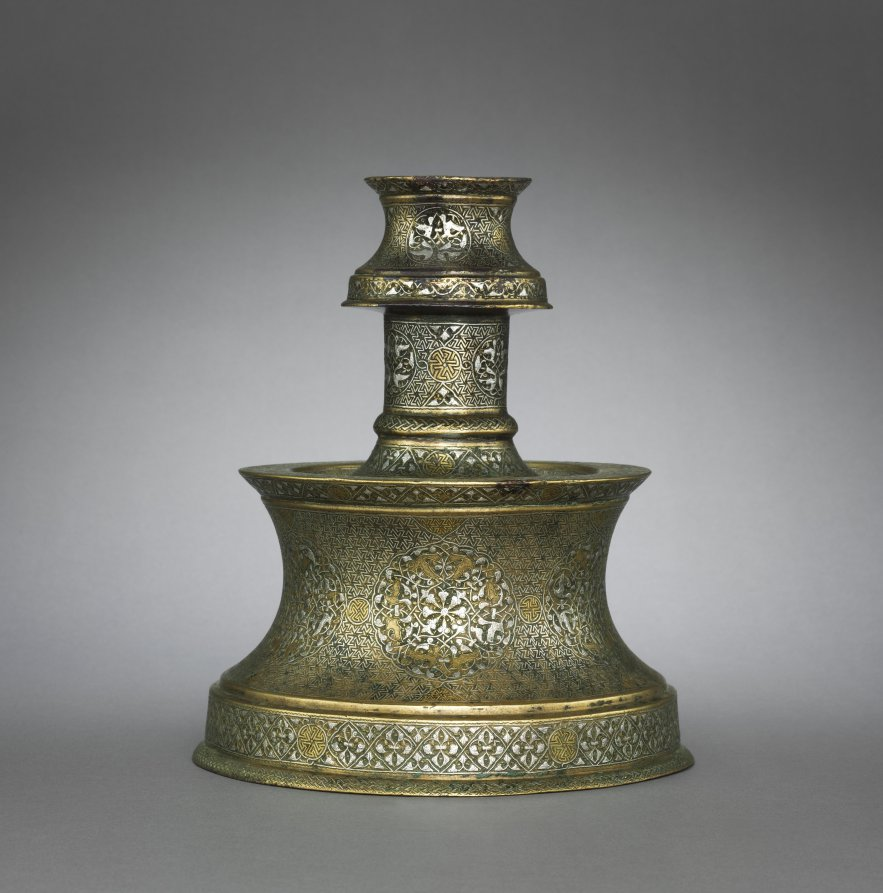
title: Candlestick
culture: Eastern Anatolia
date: 1250–1350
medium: sheet brass inlaid with silver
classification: Metalwork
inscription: none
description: Candlesticks were a common type of luxury good in the Islamic world during the medieval period. The extensive decoration on this piece is arranged in bands with roundels displaying birds in flight and leaf-like scrolls on a background of hexagonal swastikas. These ancient motifs are thought to have been sun symbols and were sometimes used as a background pattern for metalwork at this time.